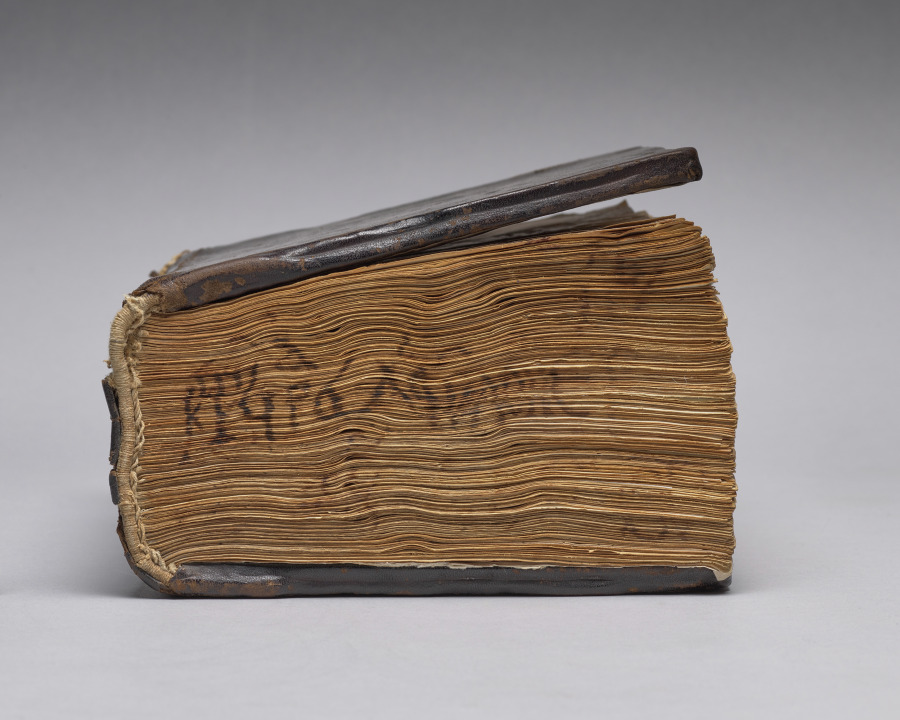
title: Gospel Book with Commentaries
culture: Byzantium, Constantinople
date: c. 1000–1100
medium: ink, tempera, and gold on vellum; leather binding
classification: Bound Volume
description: Each of the four Gospels in this book opens on a page with brilliantly illuminated borders depicting the author of the text as well as birds—principally peacocks, symbols of the immortality of the soul— and fountains, representing the fountain of life and the salvation of the soul. This volume consists of 428 leaves with texts in Greek. Its high level of sophistication is characteristic of monasteries in Constantinople.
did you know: Gospel Books were carried in procession through Byzantine churches.